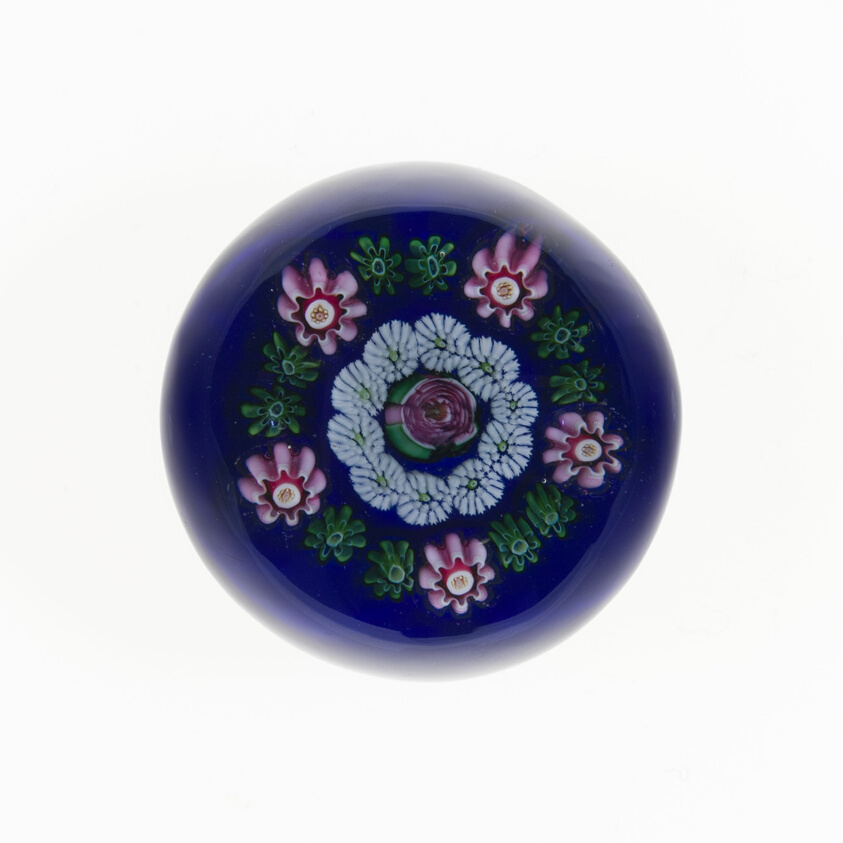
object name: Glass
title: Paperweight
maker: Clichy Glassworks (Cristalleries de Clichy); Clichy, France, 1837-1885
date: 19th century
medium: Glass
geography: Clichy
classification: paperweight; millefiori; european decorative arts; glass